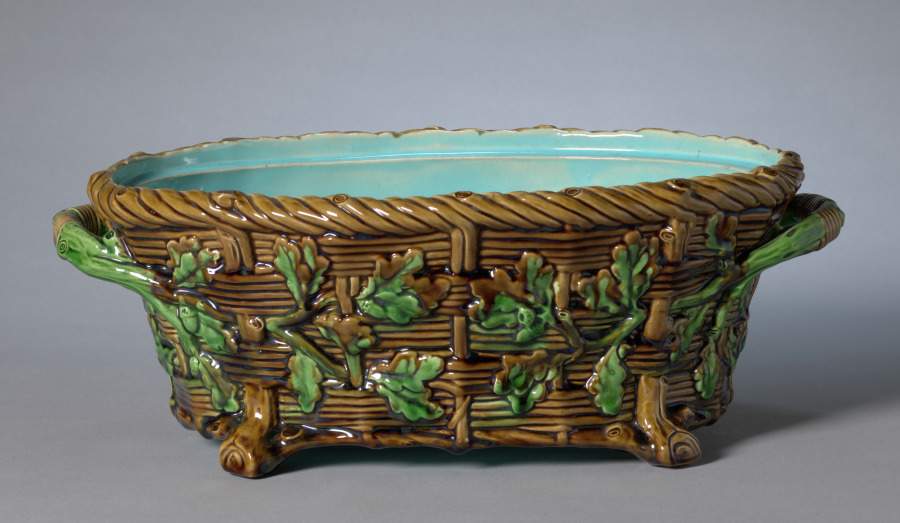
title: Game Pie Dish (Dish)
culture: England, 19th century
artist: Minton Pottery and Porcelain Factory (British)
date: c. 1860–80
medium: earthenware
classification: Ceramic